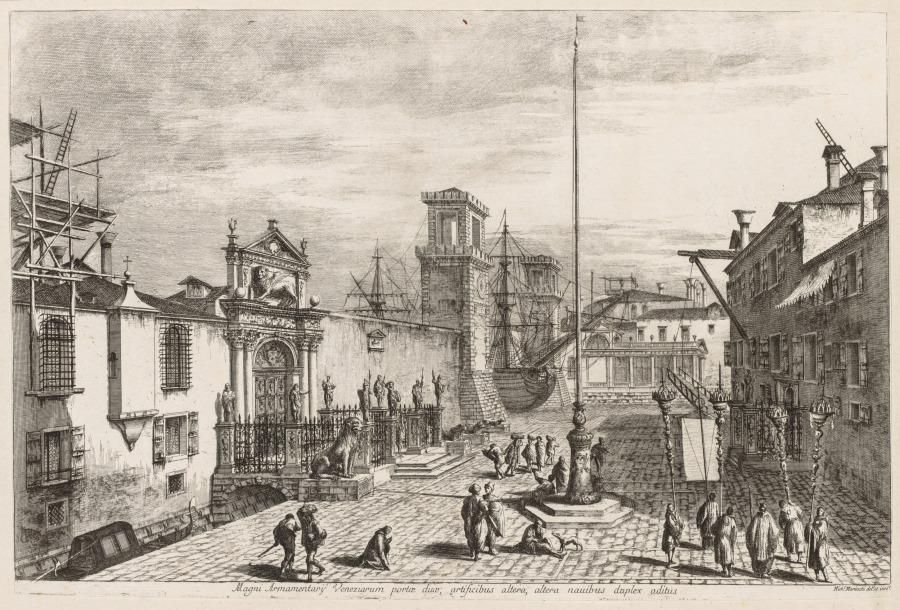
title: Views of Venice: The Gates of the Arsenal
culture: Italy, 18th century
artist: Michele Marieschi (Italian, 1710–1743)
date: 1741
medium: etching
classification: Print